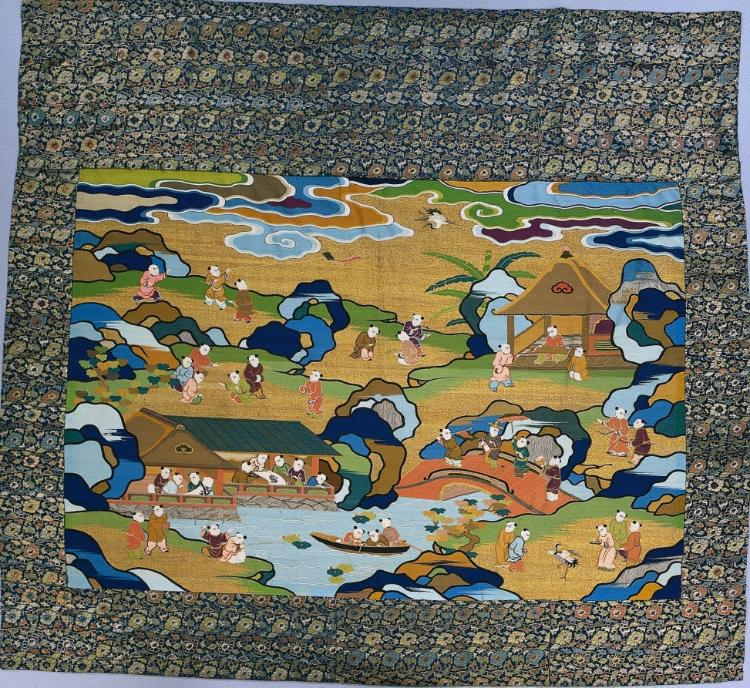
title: Tapestry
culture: China, Qing dynasty (1644-1911)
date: 1700s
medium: tapestry weave, silk and gold thread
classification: Tapestry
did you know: Figures in the pavilion are studying a scroll inscribed with the character for longevity (shou 壽).